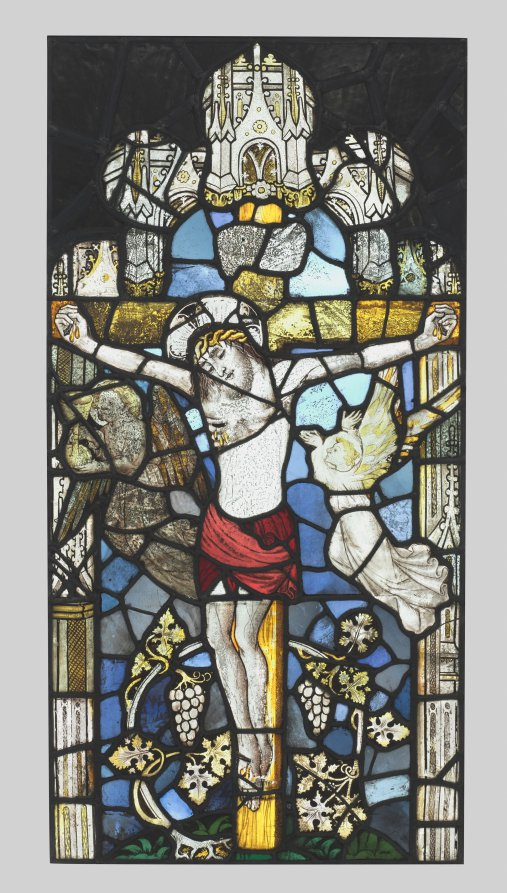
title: Crucified Christ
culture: England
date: c. 1480–1500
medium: pot metal, white glass with silver stain (with later composite glass)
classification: Glass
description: This panel would have originally been part of a much larger window. It represents the crucified Christ at the moment of death on the cross. Christ is flanked by two angels, one of which collects blood in a chalice from the wound in his right hand, a symbol of the Eucharistic wine. This potent symbol is reinforced by the scrolling vines with grapes. The window would have very likely been located behind an altar in a church where the symbolism would have resonated with the celebration of the Mass.